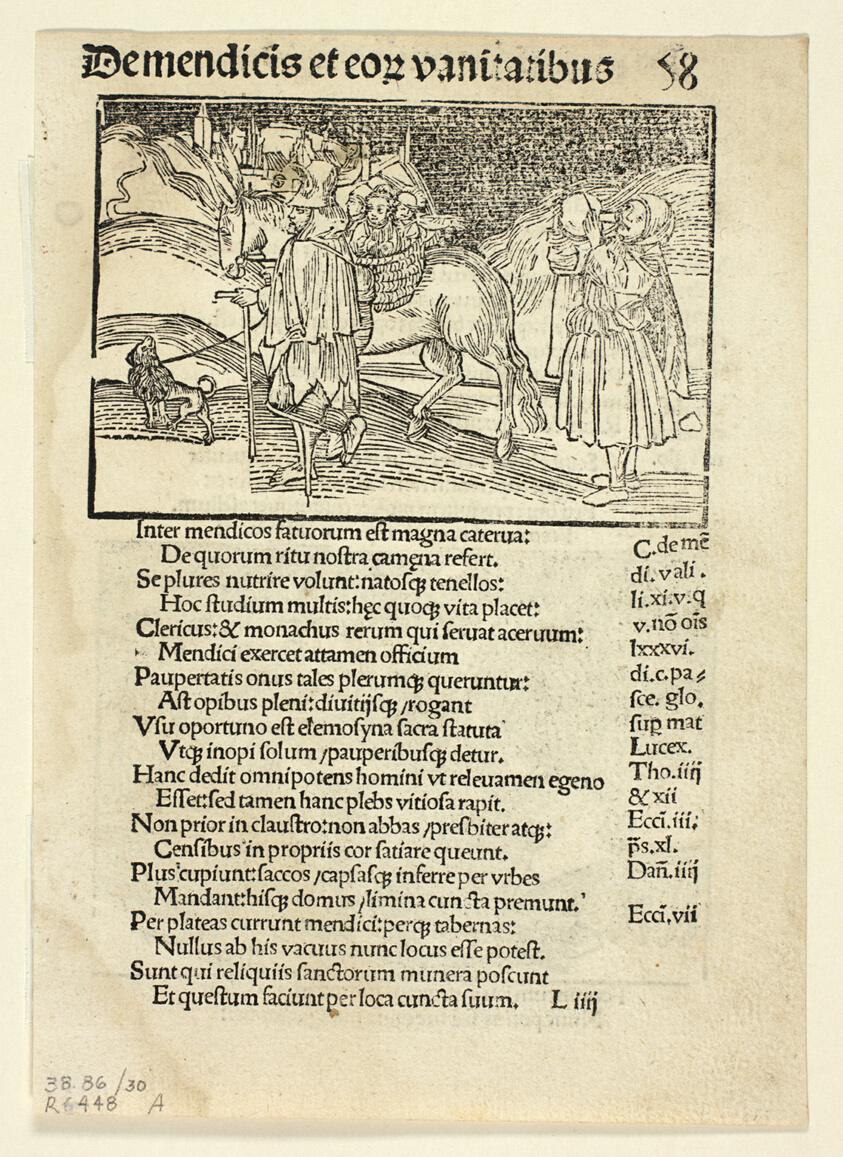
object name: Print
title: Beggars and Their Vanities (recto) and Of Irate Women (verso) from Navis Stultifera (Ship of Fools), Plate 30 from Woodcuts from Books of the 15th Century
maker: Unknown Artist (Strasbourg, late 15th century); printed and published by Johann Reinhard Grüninger (German, c. 1455–1532); original text by Sebastian Brant (German, 1457–1521); portfolio text by Wilhelm Ludwig Schreiber (German, 1855–1932)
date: 1497, portfolio assembled 1929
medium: Woodcut and letterpress in black (recto and verso) on cream laid paper, tipped onto cream wove paper mat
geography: Germany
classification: woodcut; print; prints and drawing